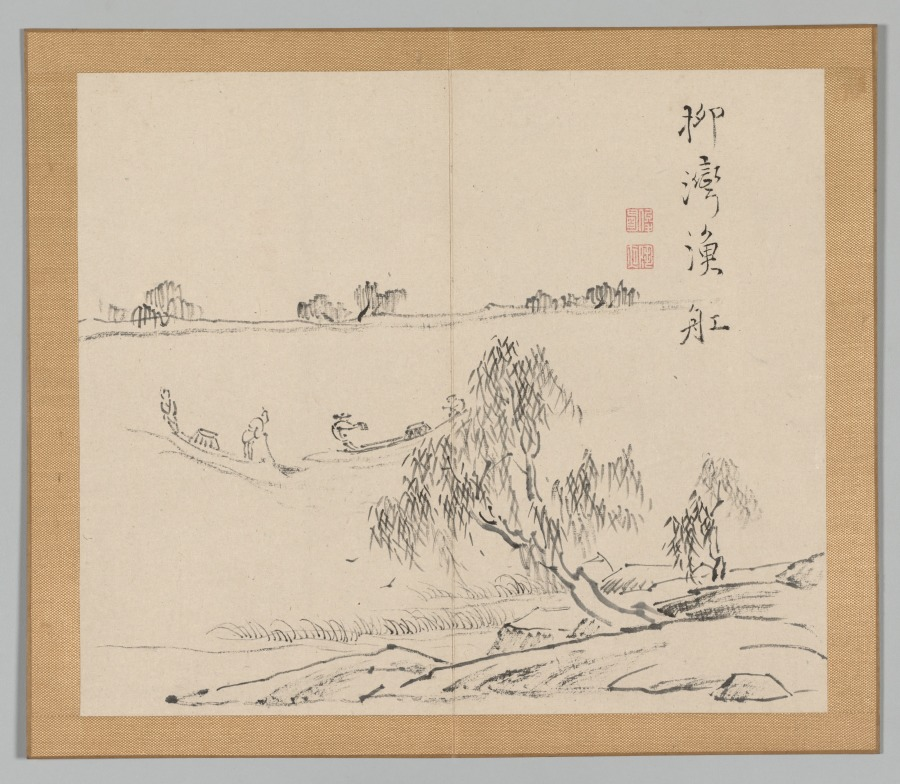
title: Reverberations of Taiga, Volume 2 (leaf 27)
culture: Japan, Edo period (1615–1868)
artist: Aoki Shukuya (Japanese, d. 1802)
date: mid- to late 1700s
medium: double-leaf from a pair of albums; ink and light color on paper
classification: Portfolio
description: Traditionally, young painters in Japan began their studies with an established master-painter. The master's compositions invariably became models that the apprentice copied to learn various ink and brush techniques. Shukuya was a pupil of the famous Kyoto artist Ikeno Taiga, whose style is reflected in these sketches of rocks, trees, and mountains.